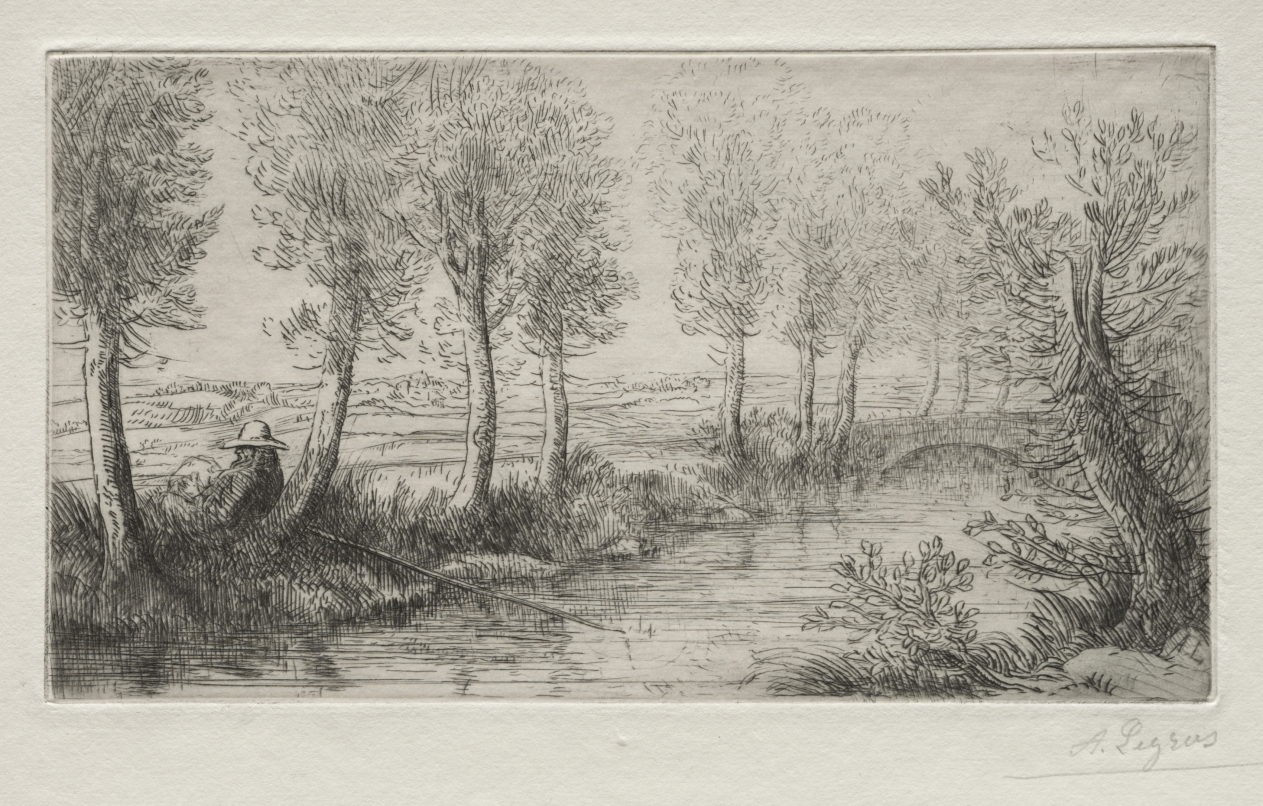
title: Near the Mill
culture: France, 19th-20th century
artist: Alphonse Legros (French, 1837–1911)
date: c. 1857–1911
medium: etching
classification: Print